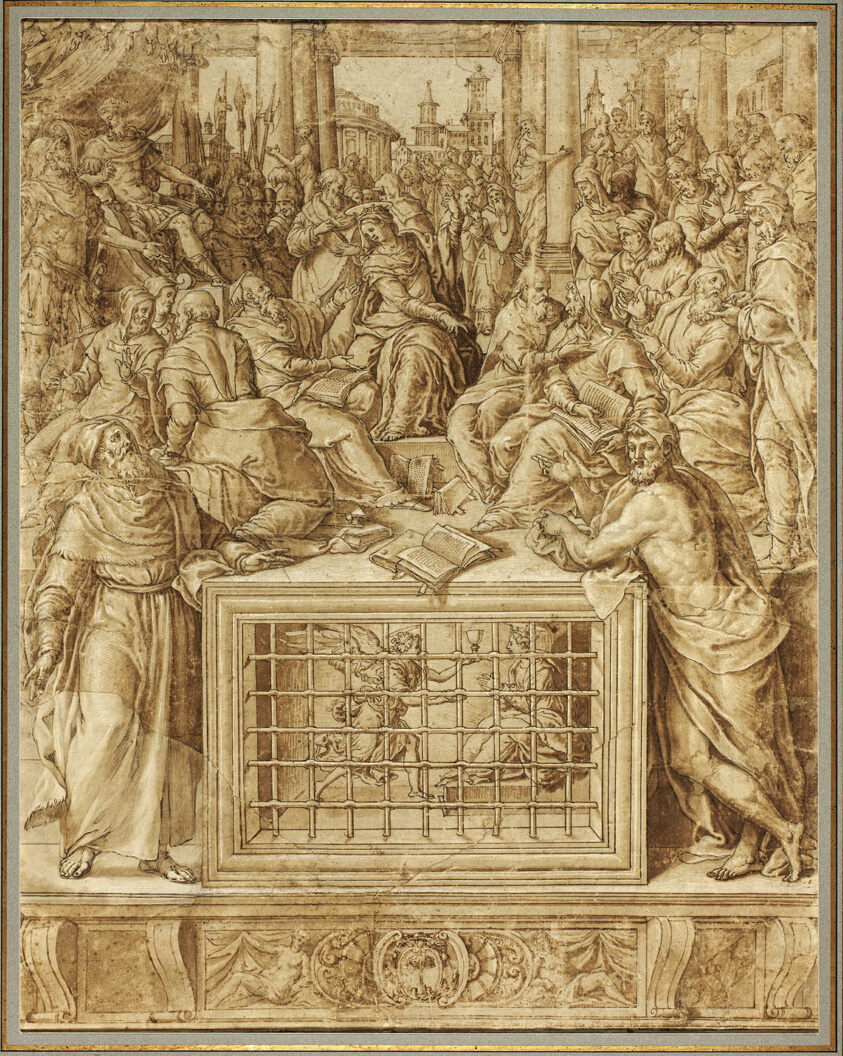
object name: Drawing and Watercolor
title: Saint Catherine Disputing with the Philosophers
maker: Livio Agresti (Italian, 1508–1579)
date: 1562/63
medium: Pen and brown ink, with brush and brown wash, heightened with white gouache, over black chalk, on cream laid paper, pieced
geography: Italy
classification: pen and ink drawings; brush and ink; brush and wash; drawings (visual works); paper; prints and drawing; gouache; chalk; chalk with ink